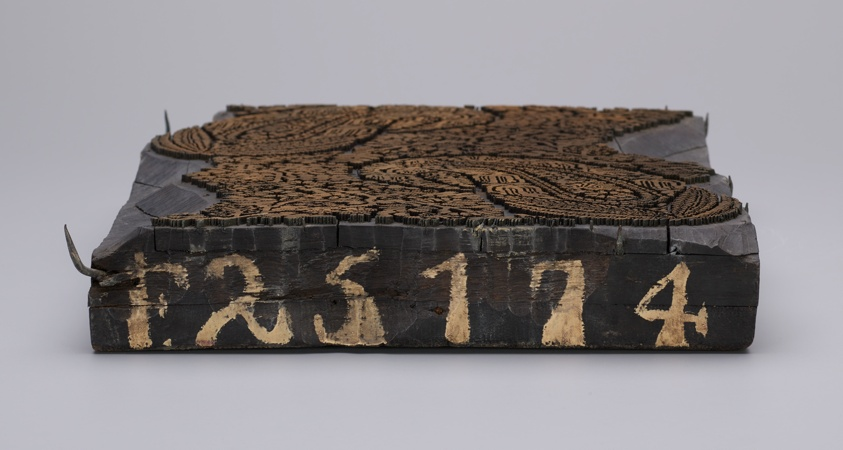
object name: Textile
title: Six Printing Blocks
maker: England or France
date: before 1850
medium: Carved wood, treated in a variety of techniques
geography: England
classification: printing blocks (printing surfaces); textile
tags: paisley